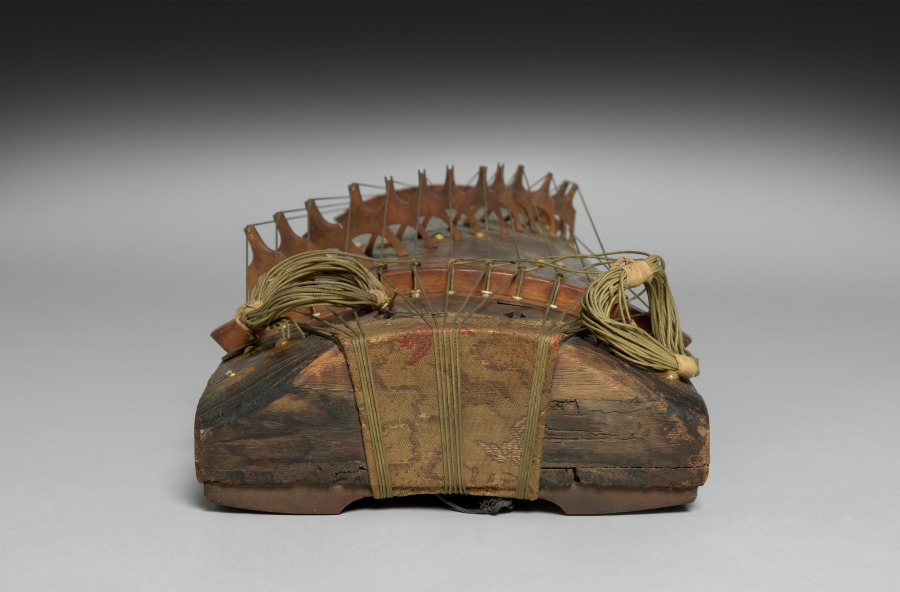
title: Koto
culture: Japan, Edo period (1615–1868)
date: early to mid-1800s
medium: Wood with colored lacquer, sprinkled gold powder (maki-e), glass, textile and cord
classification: Musical Instrument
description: This koto has an elaborately decorated surface, suggesting that it was meant to be admired as a decorative object rather than played as a musical instrument. The vertical design shows a profusion of chrysanthemum and miscanthus grass above a brushwood fence as well as a pair of butterflies.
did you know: The koto descended from the guzheng, a Chinese zither first imported to Japan in the seventh century.